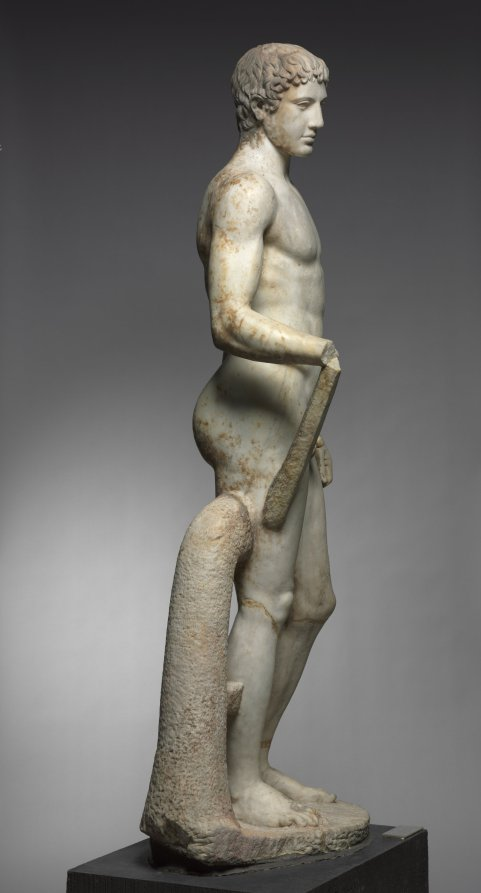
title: Statue of an Athlete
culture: Italy, Roman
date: 1–100 CE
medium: marble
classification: Sculpture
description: This idealized athlete recalls Greek sculptural types invented and popularized during the 400s BC. Large-scale athletes and other sculptures like this were originally created by famous artists as sanctuary dedications. Centuries later, they were widely copied and adapted by Roman sculptors, whose clients sought their own versions of earlier masterpieces. Working in marble rather than bronze, these sculptors added certain elements for stability, such as the struts and the large tree trunk beside the right leg here. Sculptures like this one are profoundly complex, made by and for Romans but descended from Greek ancestors.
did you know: For many years, this sculpture stood in the rotunda of the Cleveland Museum of Art.